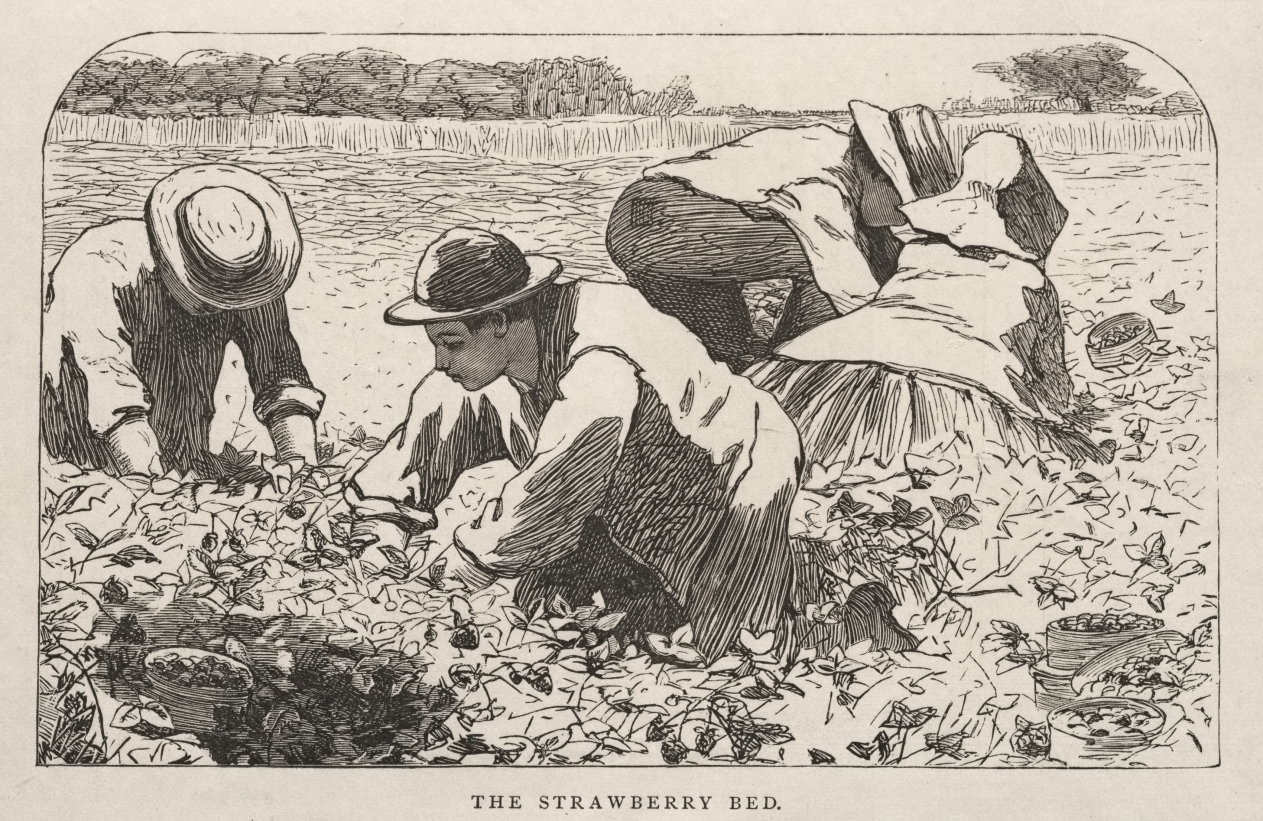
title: The Strawberry Bed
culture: America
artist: Winslow Homer (American, 1836–1910)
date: 1868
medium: wood engraving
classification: Print